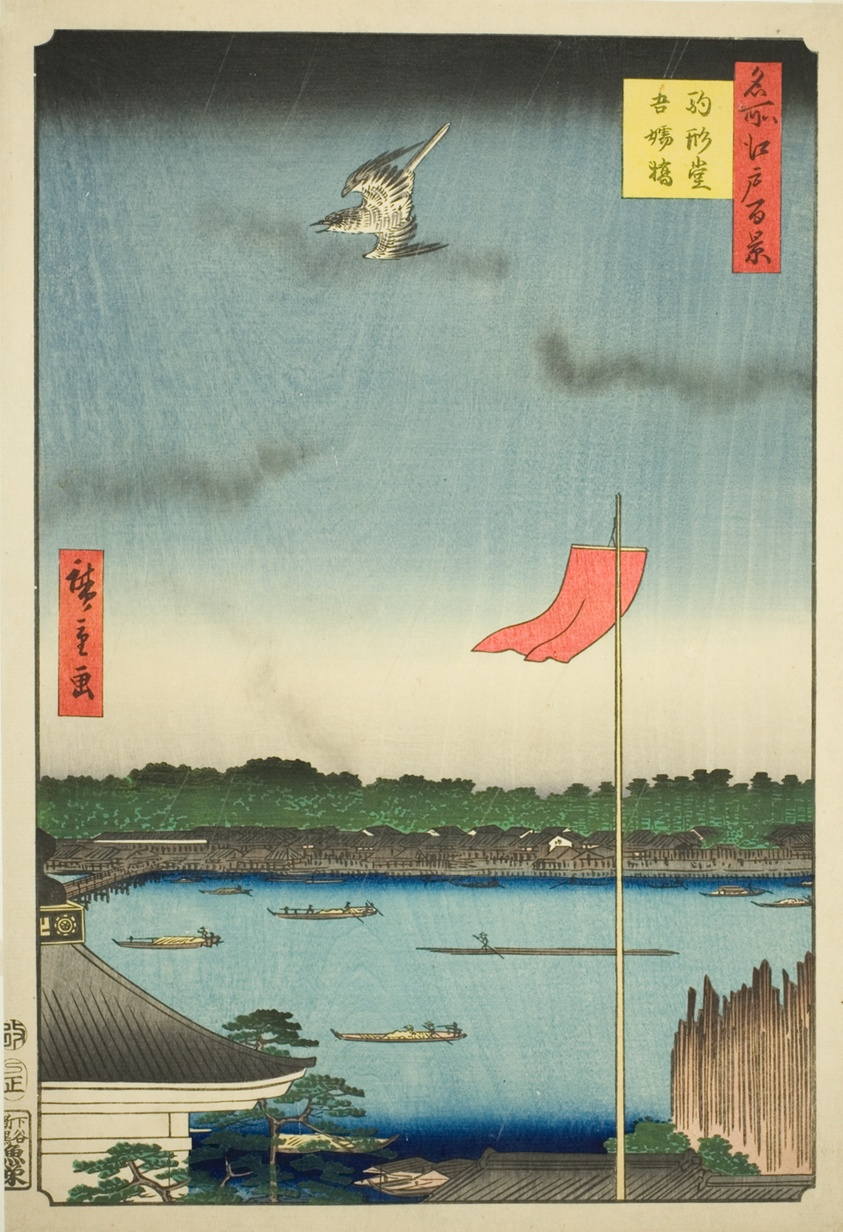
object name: Print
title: Komagata Hall and Azuma Bridge (Komagatado Azumabashi), from the series "One Hundred Famous Views of Edo (Meisho Edo hyakkei)"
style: Japanese (culture or style)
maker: Utagawa Hiroshige 歌川 広重; Japanese, 1797-1858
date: 1857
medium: Color woodblock print; oban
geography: Japan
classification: woodblock print; print; asian art